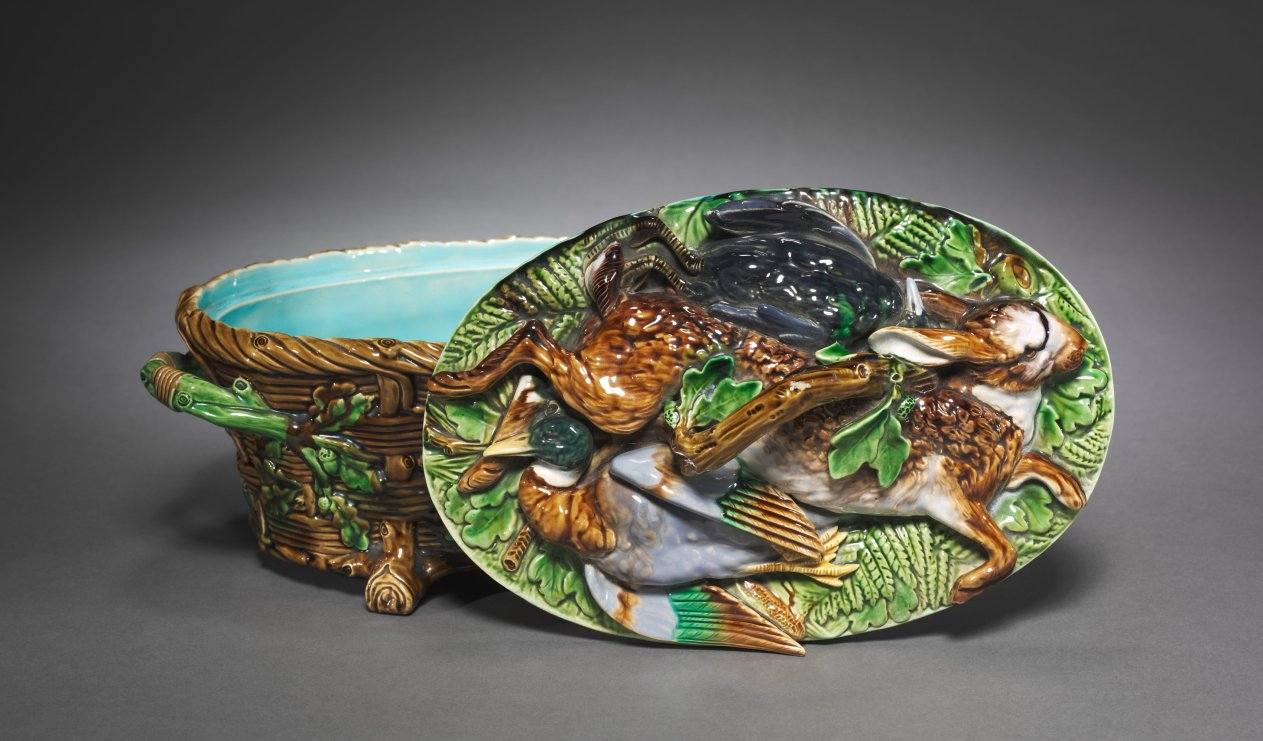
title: Game Pie Dish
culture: England, 19th century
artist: Minton Pottery and Porcelain Factory (British)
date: c. 1860–80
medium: earthenware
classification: Ceramic